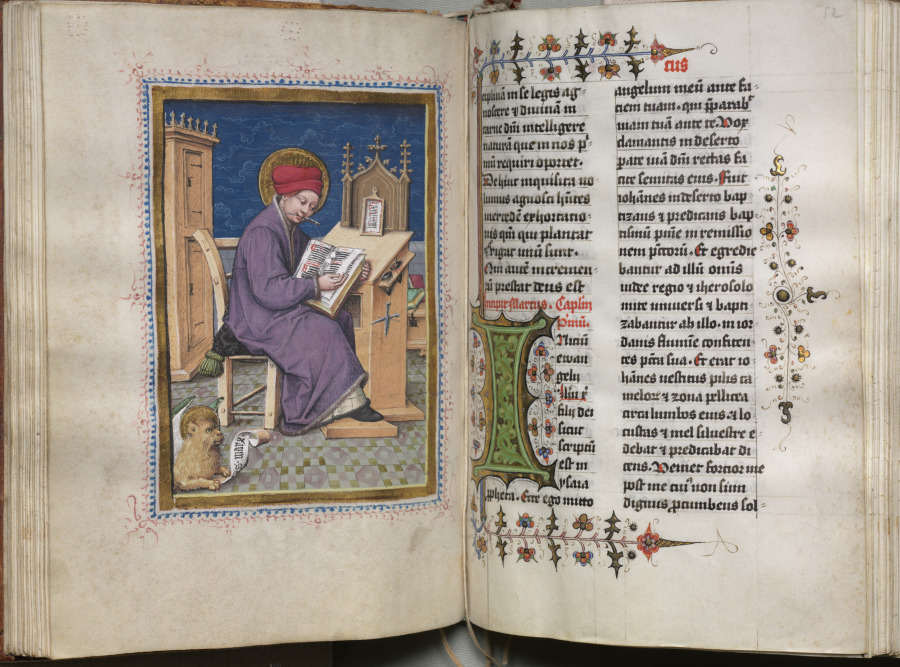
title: Gospel Book with Evangelist Portraits: Saint Mark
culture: Germany, Middle Rhine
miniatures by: Master of the House-Book (German, c. 1470–1500)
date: c. 1480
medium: ink, tempera, and gold on vellum; original blind stamped leather binding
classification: Bound Volume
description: Each of the four gospels, here in Latin, are preceded by a full-page miniature of the appropriate Evangelist. As is conventional, the Evangelists are represented as contemporary scribes seated at a lectern surrounded by all the accouterments of the trade---inkpots, quill pens, penknives, etc. The miniatures' style is characteristically German late Gothic in its expressive use of angular drapery and realistic detail. Each miniature, however, bears the marks of The Hausbuch Master's hand: notice the terrace space for each figure and the emphasis on realistically rendered details, such as the furniture construction and the tools of the scribe as well as the facial types, with their heavy-lidded, downcast eyes. This artist was occasionally noted for his humor, as here in the portrait of the Evangelist John in which he depicted the saint erasing an error in his text with a pen knife in his left hand and a quill pen in his right. The skillful penwork, tracery, vine scrolls, and the large initials are the work of the other artists. The binding is original. The Hausbuch Master is known primarily for an album of lively drawings as well as some ninety copper engravings. He was also a panel painter of some distinction.